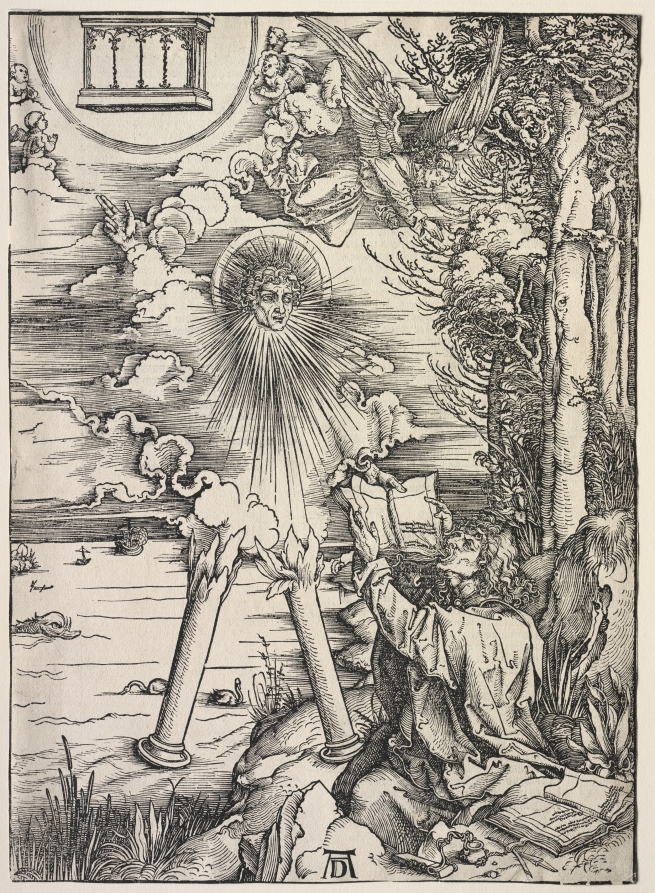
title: Revelation of St. John: St. John Devouring the Books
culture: Germany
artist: Albrecht Dürer (German, 1471–1528)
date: 1511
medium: woodcut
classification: Print